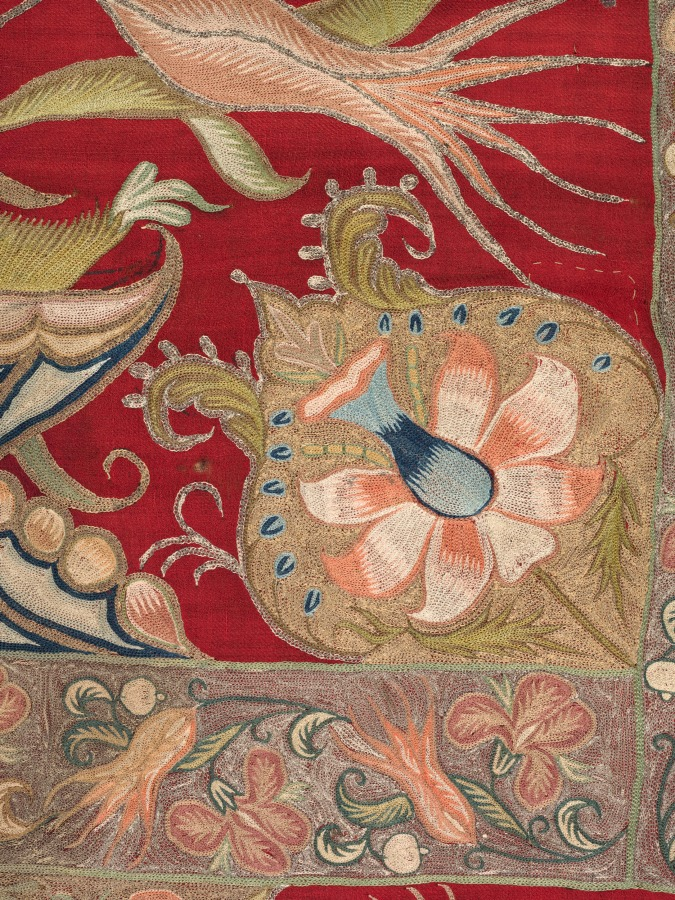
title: Embroidered Armenian liturgical curtain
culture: Turkey, Constantinople/Istanbul, Ottoman period (1299–1922)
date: 1763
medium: twill weave: wool; embroidery, chain stitch: silk, gilt- and silver-metal thread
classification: Textile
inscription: Inscription embroidered in erkatagir script with metal thread reads: "This curtain (varakouyr) is in memory of the people of Hassan Pasha Khan who gave it to the Monastery (vank) of Saint John the Baptist (Surp Garabed) on the Armenian date 10 May 1212 (1763 AD)."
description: This rare Ottoman embroidery features a floral bouquet that enriches the field under an elegant arch of gilt-metal thread. Flanked by vines of tulips and irises on a silver-metal-thread ground, vases of tulips and jonquils within cartouches adorn the main border and the well-turned corners, a sign of high quality. Dated 1763, the textile documents a mid-18th-century style and technique uncommon in Ottoman embroideries. The Armenian community commissioned this pattern for a liturgical curtain. Beneath the arch, Saint John the Baptist appears with a staff of victory, holding his own severed head in one arm and the Lamb of God in the other. The embroidered Armenian inscription reads: "This curtain is in memory of the people of Hassan Pasha Khan who gave it to the Monastery of Saint John the Baptist on the Armenian date 10 May 1212 [1763]."